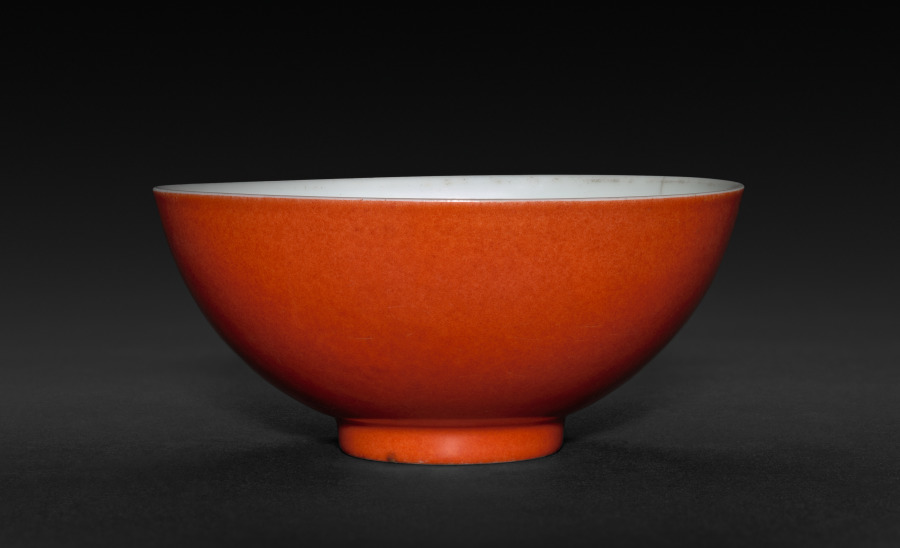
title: Wine Cup with Monochrome Red Glaze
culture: China, Jiangxi province, Jingdezhen kilns, Qing dynasty (1644-1911), Yongzheng mark and reign (1723-35)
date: 1723–35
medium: porcelain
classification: Ceramic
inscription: 大清雍正年制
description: In the Qing dynasty (1644–1911), luxury items became more affordable to larger parts of the society, including women, merchants, and literati in non-official positions. Imperial patronage and a growing urban population encouraged consumption of luxury goods and local craftmanship. This wine cup has a coral glaze on outside and a transparent glaze of white eggshell porcelain on the inside. It exemplifies Qing dynasty accomplishments in porcelain techniques and the creative mind of talented artisans who sought clients on a competitive market.